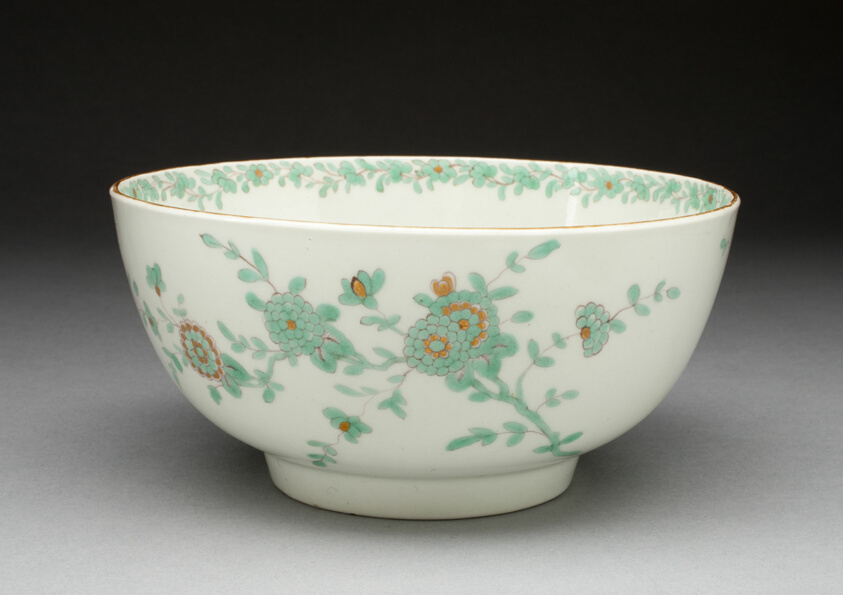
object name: Ceramics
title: Slop Bowl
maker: Worcester Porcelain Factory (Warmstry House Period, 1751–1783); Worcester, England, founded 1751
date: c. 1770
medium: Soft-paste porcelain with green and black enamels and gilding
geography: Worcester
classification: slop bowl; tableware; teaware; ceramics; porcelain; european decorative arts